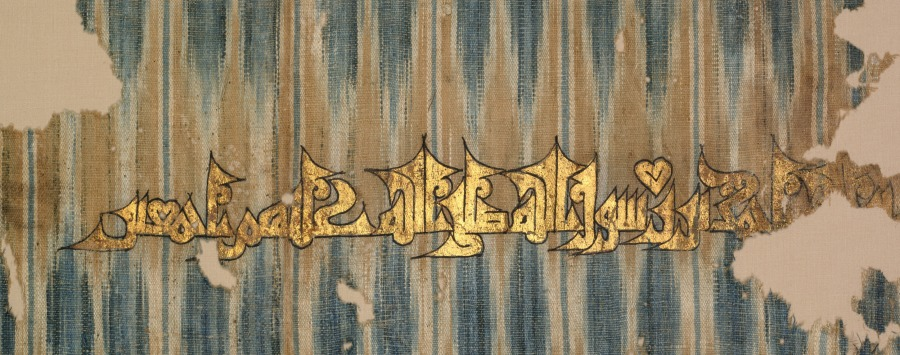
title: Ikat tiraz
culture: Yemen, San'a', Zaydi Imam period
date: 960–80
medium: resist-dyed warp (ikat); plain weave with inscription: cotton and gold leaf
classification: Textile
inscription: Kufic inscription, translated as: ". . . [a]l-Dá'i ilá al-Haqq, Commander of the Believers, Yusuf b. Yahya b. al-Nasir li-Din Allah Ahmad, son of the apostle of God, may God bless them all." At the bottom, the word "to God" is inverted. "Yusuf ibn Yahya" ruled AD 968-998)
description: The "flame" pattern was dyed on the vertical warp threads before weaving began by tightly binding them to resist dye penetration, and repeated for each color. The process and fabric are called ikat, a Malaysian word which may have originated in South Arabia. Yemeni ikats with historical Arabic inscriptions from the 10th century are among the oldest known. This text, written in Kufic script with gold leaf outlined in black, identifies a ruler of the Yemen: ". . . [a]l-Da’i ila al-Haqq, Commander of the Believers, Yusuf b. Yahya b. al-Nasir li-Din Allah Ahmad, son of the apostle of God, may God bless the all." The Arabic phrase "to God" is inverted at the bottom.